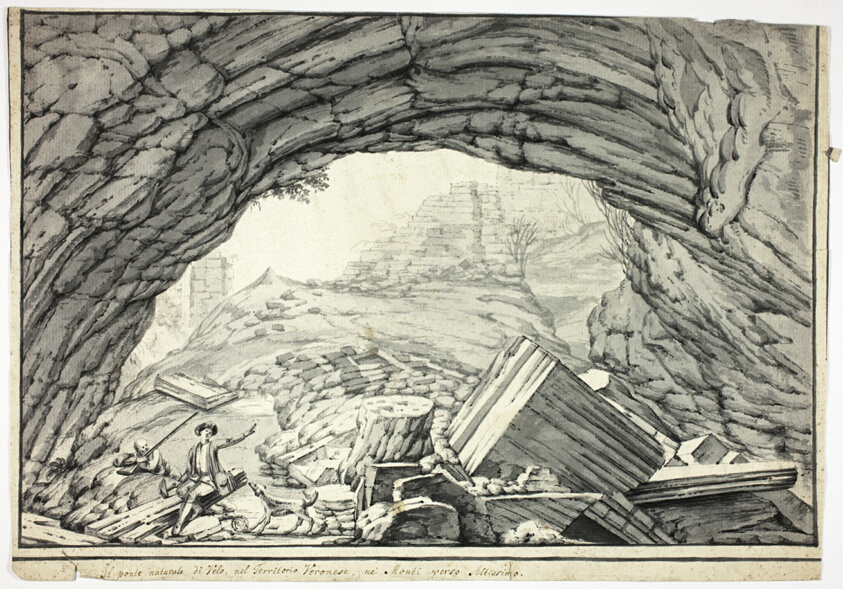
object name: Drawing and Watercolor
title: Natural Bridge of Velo, in the Veronese Hills, Near Altissimo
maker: Unknown Artist; Italian, possibly 18th century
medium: Pen and black ink and brush and gray wash on ivory laid paper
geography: Italy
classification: drawings (visual works); pen and ink drawings; brush and wash; prints and drawing; paper